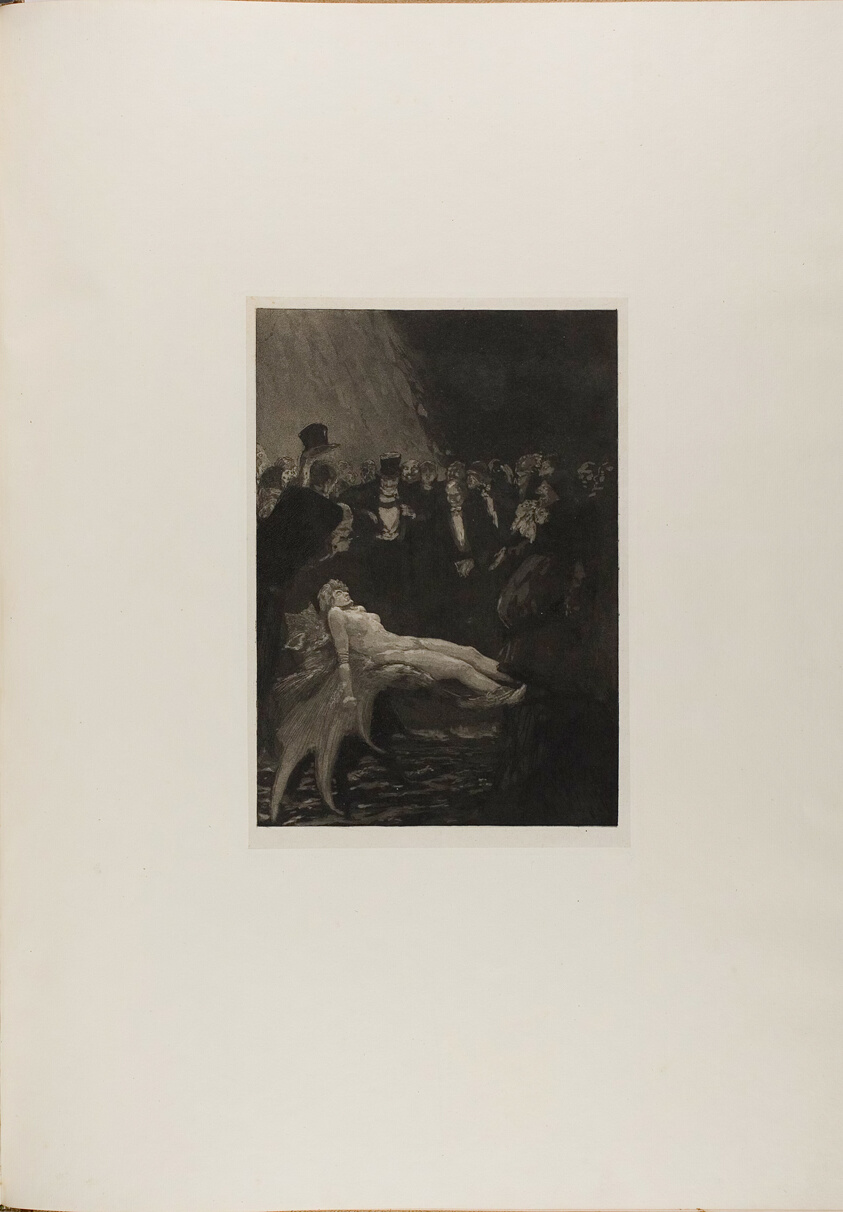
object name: Print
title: Chained, plate eleven from A Life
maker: Max Klinger (German, 1857-1920); printed by Otto Felsing (German, 19th century)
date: 1884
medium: Aquatint and etching on ivory China paper, laid down on cream laid paper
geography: Germany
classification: aquatint; print; prints and drawing